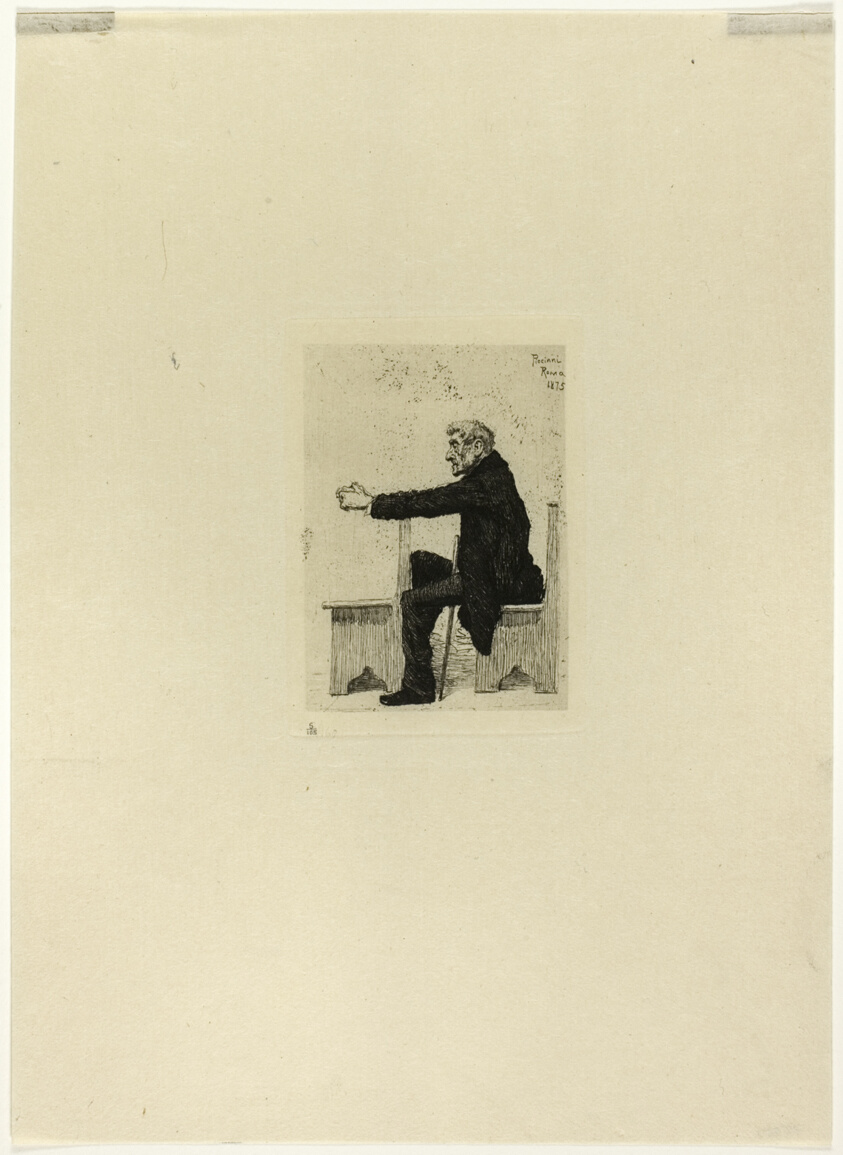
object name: Print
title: Old man in church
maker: Antonio Piccinni (Italian, 1846-1920)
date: 1875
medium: Etching in black, with gray plate tone, on paper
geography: Italy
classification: etching; print; prints and drawing